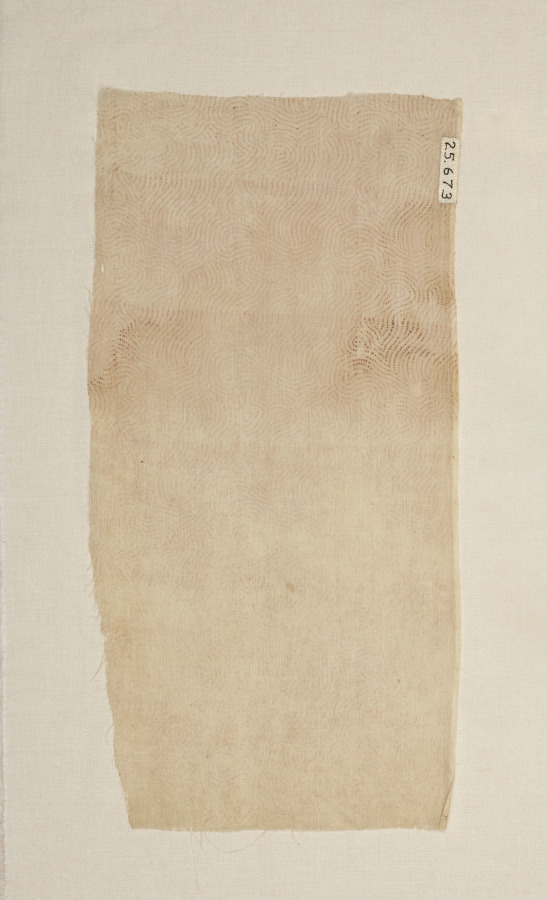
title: Fragment of Draped Apparel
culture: India, Rajasthan or Northern Deccan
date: 1700s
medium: cotton muslin: plain weave; block printed with gold leaf (vavak)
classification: Textile